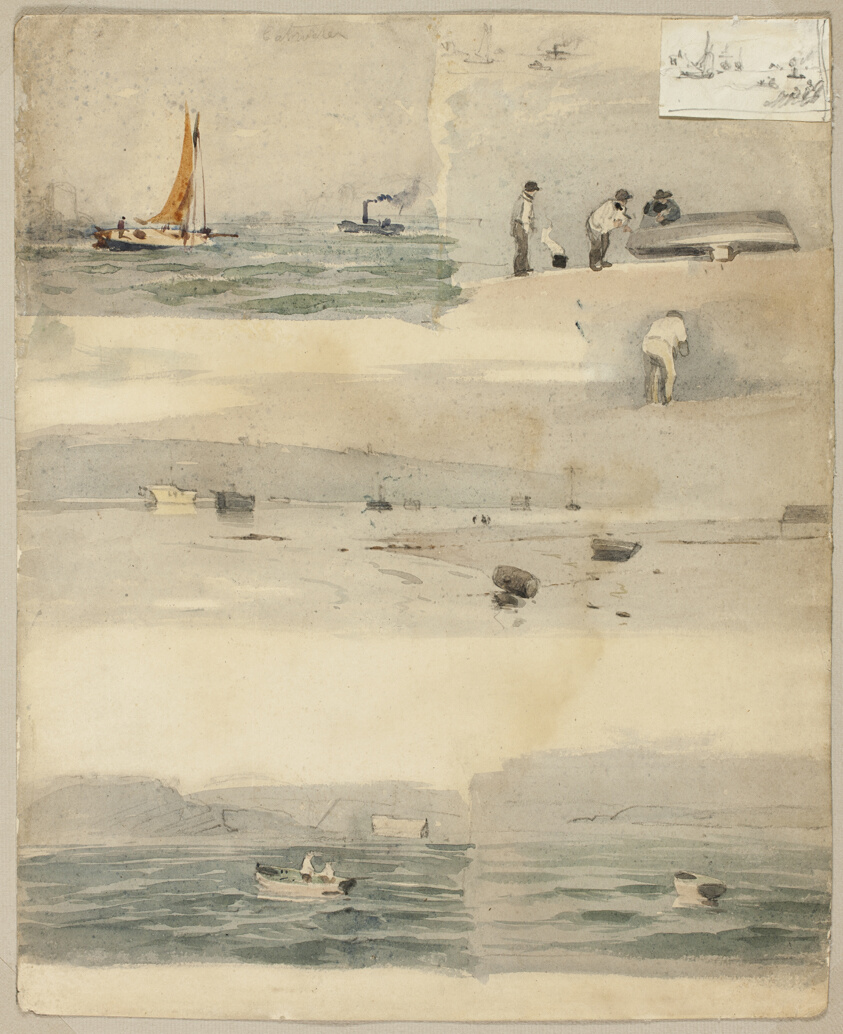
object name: Drawing and Watercolor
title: Sketches of Marine Scenes (recto); Two Sketches: Beside Stormy Coast, Cloudy Seascape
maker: Attributed to Édouard Manet; French, 1832-1883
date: 1852/83 (recto); c. 1871 (verso)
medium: Watercolor and graphite (recto), and watercolor with traces of graphite, heightened with touches of white gouache (verso), on off-white wove paper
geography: France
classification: drawings (visual works); prints and drawing